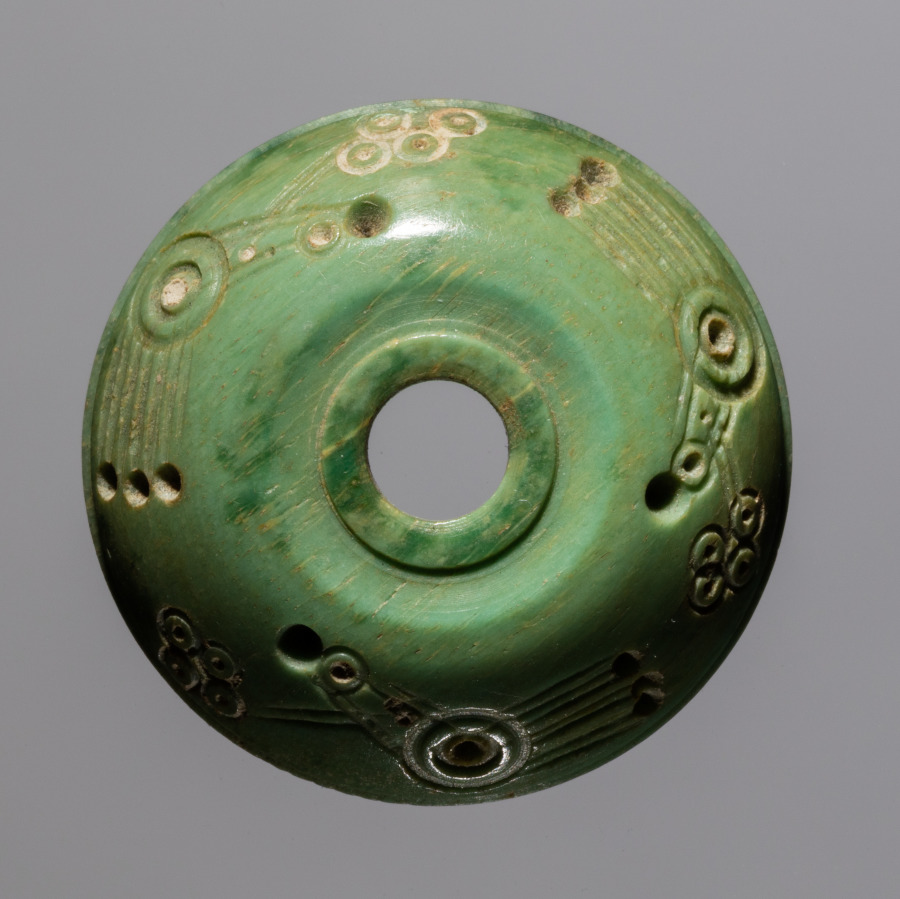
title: Spindle Whorl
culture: Iran, early Islamic period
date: 700s - 900s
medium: bone, incised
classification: Spindle Whorl